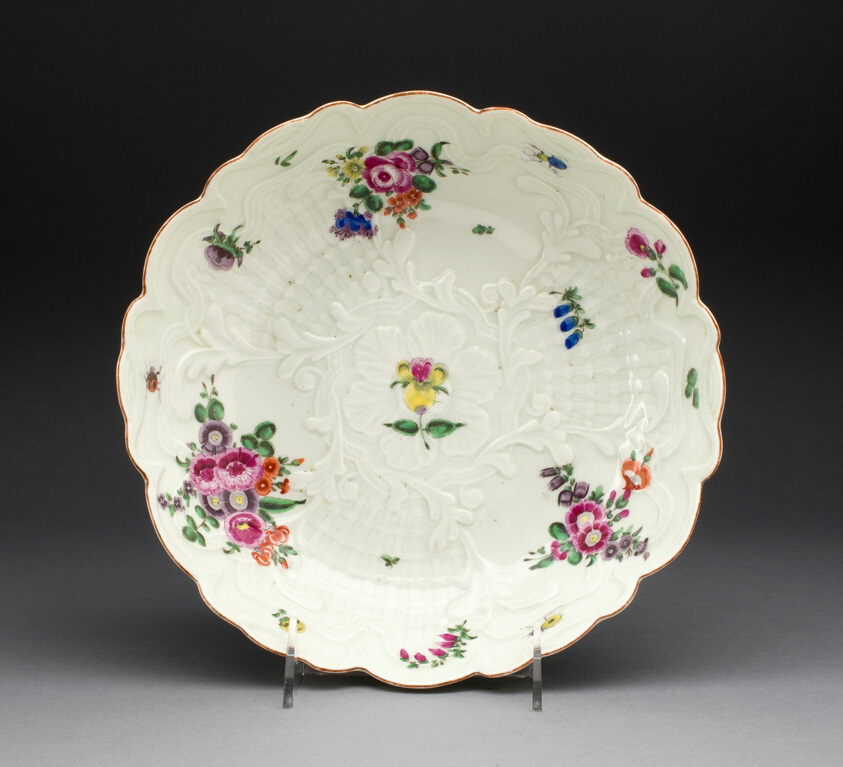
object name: Ceramics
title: Dish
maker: Worcester Porcelain Factory (Warmstry House Period, 1751–1783); Worcester, England, founded 1751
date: c. 1760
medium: Soft-paste porcelain, polychrome enamels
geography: Worcester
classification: dish (vessel); porcelain; european decorative arts; ceramics